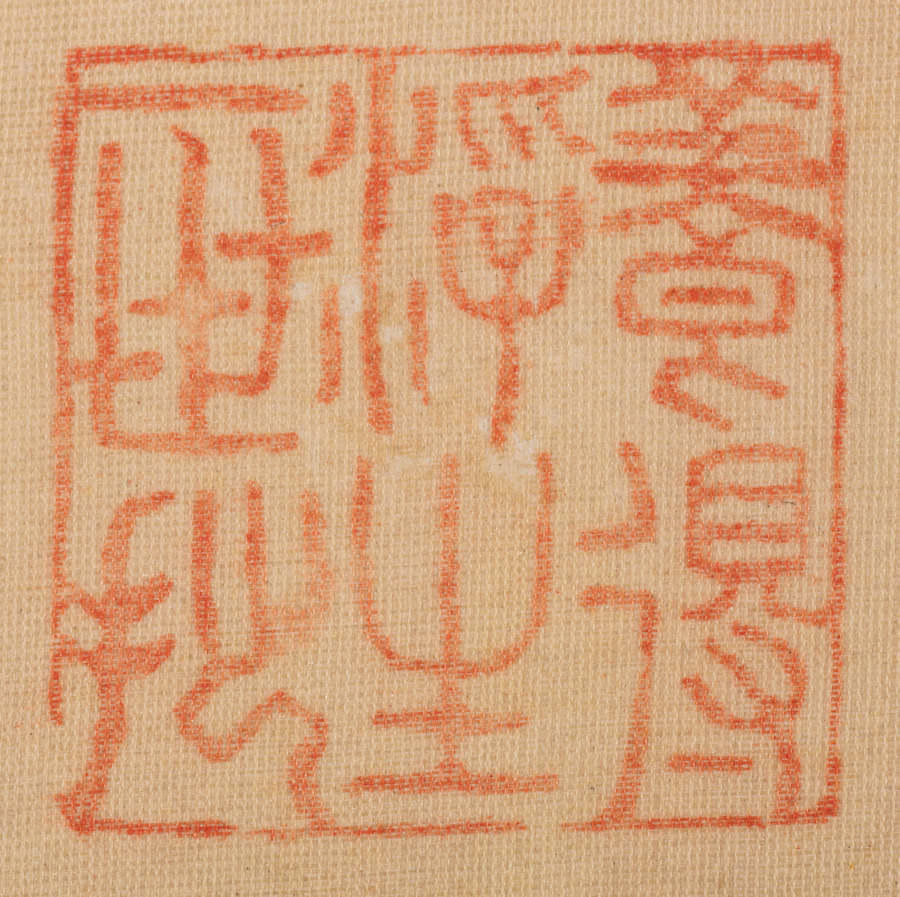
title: Orchids and Rocks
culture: Korea, Joseon dynasty (1392–1910)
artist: Yi Ha-eung (Korean, 1820–1898)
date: 1897–98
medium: Eight-panel folding screen; ink on silk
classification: Painting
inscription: Translation: [I] painted for the high minister Yangwon. [I] humbly request your corrections and advice [on my painting]. [By] an eighty-year old gentleman of rocks.)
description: Yi Ha-eung (1820−1898), the artist of this eight-panel folding screen, was one of the most influential men in late 19th-century Korea. Acting as the regent for his son, King Gojong (1852−1919), who ascended the throne at the age of thirteen, Yi ruled Korea from 1866 to 1873. In addition to his illustrious political career, Yi was also recognized as one of the most celebrated artists who led the revival of literati art in late 19th-century Korean art. In particular, he was recognized as the master of orchids, one of the “Four Gentlemen” (plum, orchid, chrysanthemum, and bamboo) themes. Solely relying on monochrome ink, Yi depicted the curvilinear silhouettes of cymbidium orchid leaves dramatically hanging down from cliffs. Growing in wilderness and redolent with fragrance, orchids were often associated with the perseverance of principled gentlemen, and thus became one of the most popular subjects of scholar-artists' paintings.On the upper right corner of the far left panel, Yi wrote a short inscription stating that he painted the work at the age of 80.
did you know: The artist of this elegant painting is the formidable politician Yi Ha-eung (1820–1898), who is known for a seclusion policy that aimed to protect Korea and its sovereignty from foreign influences.